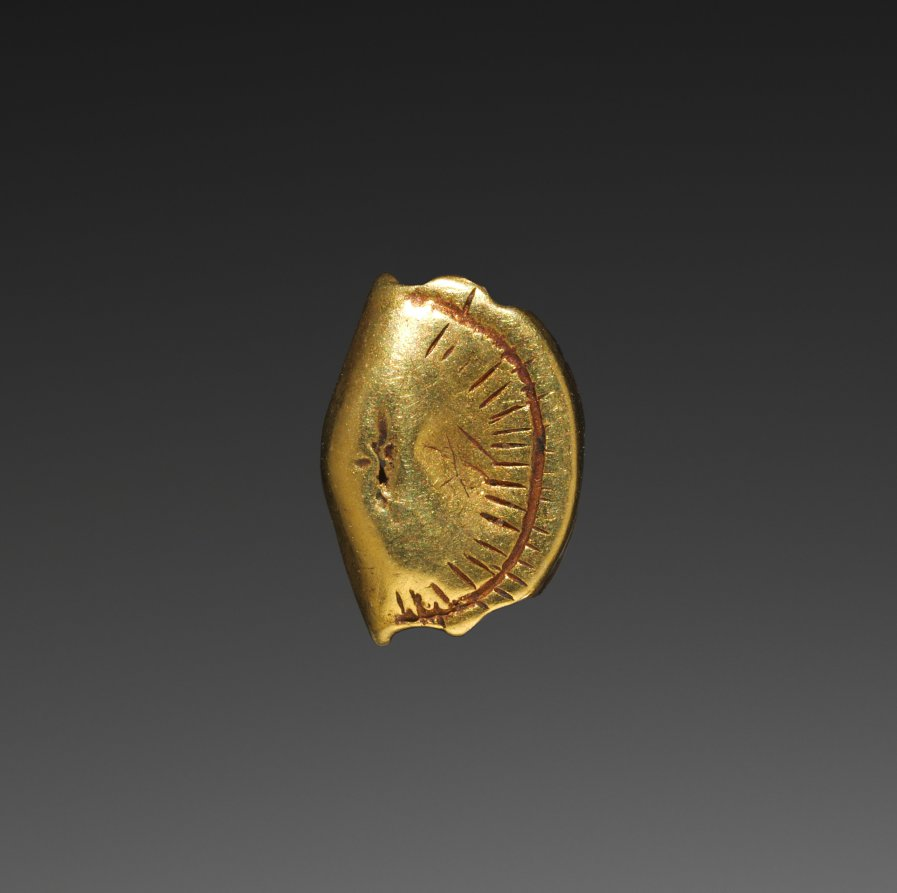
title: Wallet Bead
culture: Egypt, New Kingdom (1540–1069 BCE), Dynasty 18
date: 1540–1296 BCE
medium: gold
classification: Jewelry